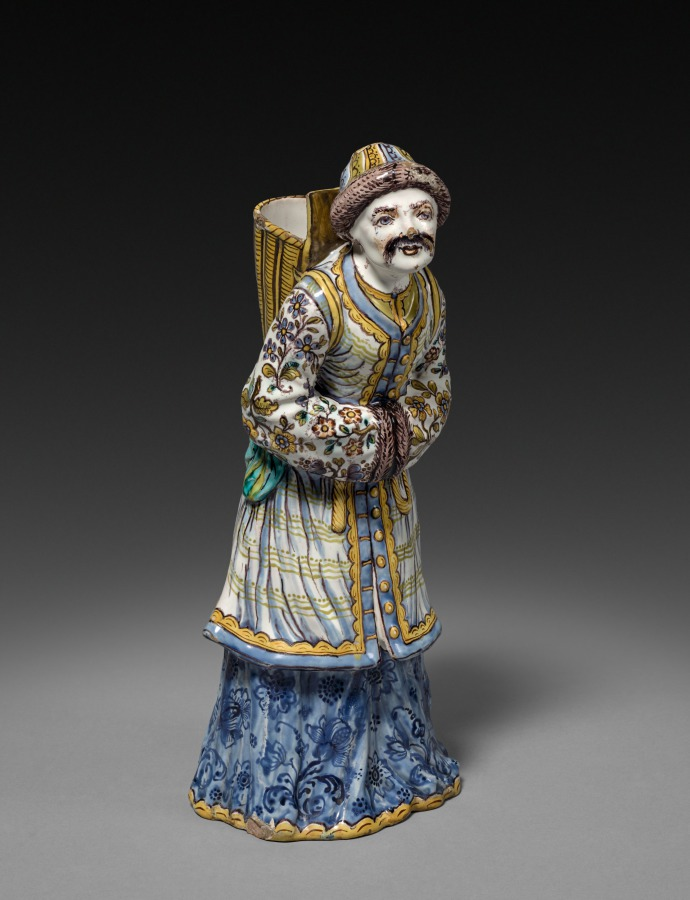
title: Figure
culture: France, Strasbourg, 18th century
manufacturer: Strasbourg Factory (France)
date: 1745–50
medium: faience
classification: Ceramic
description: For several decades in the middle of the 18th century the Hannong family were proprietors of one of the best and most influential French faience factories at Strasbourg. Here German and French ceramic styles and techniques met and were fused. These figures were copied from a pair executed in Chantilly porcelain which in turn relied on a Meissen prototype.